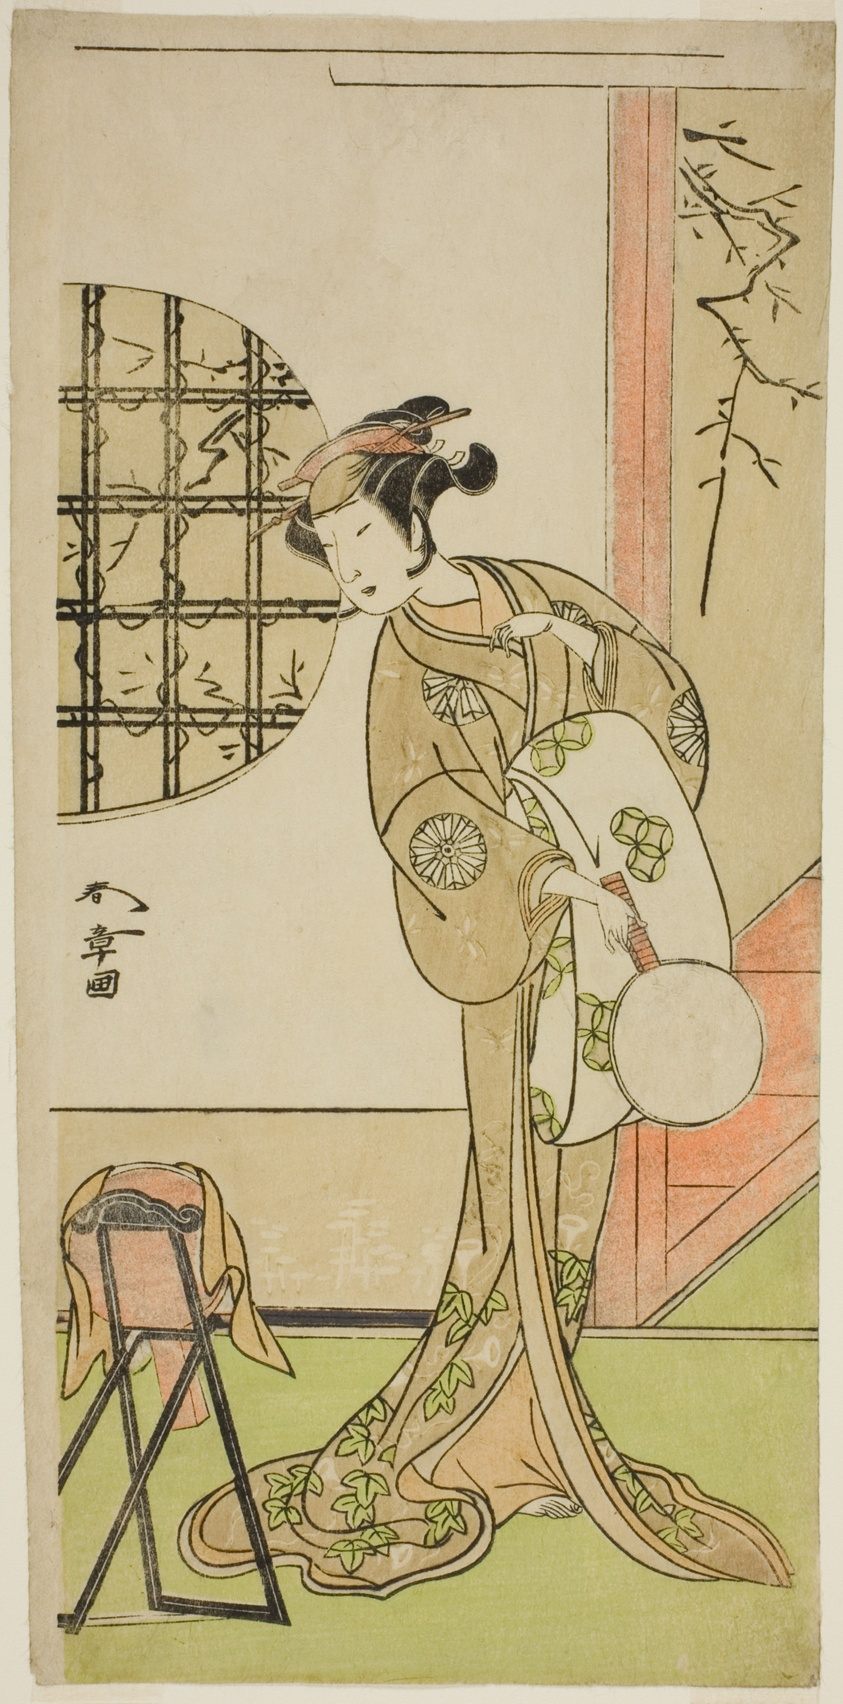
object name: Print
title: The Actor Nakamura Noshio I in an Unidentified Role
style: Japanese (culture or style)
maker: Katsukawa Shunsho 勝川 春章; Japanese, 1726-1792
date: c. 1773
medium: Color woodblock print; hosoban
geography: Japan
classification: woodblock print; print; asian art